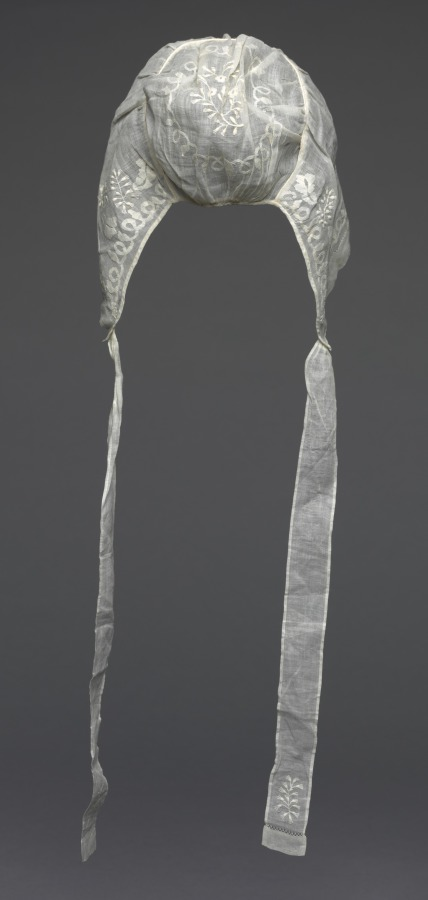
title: Infant's Cap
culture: America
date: 1800–1850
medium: Plain weave linen: needle lace (cutwork and drawn work) and embroidery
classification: Embroidery